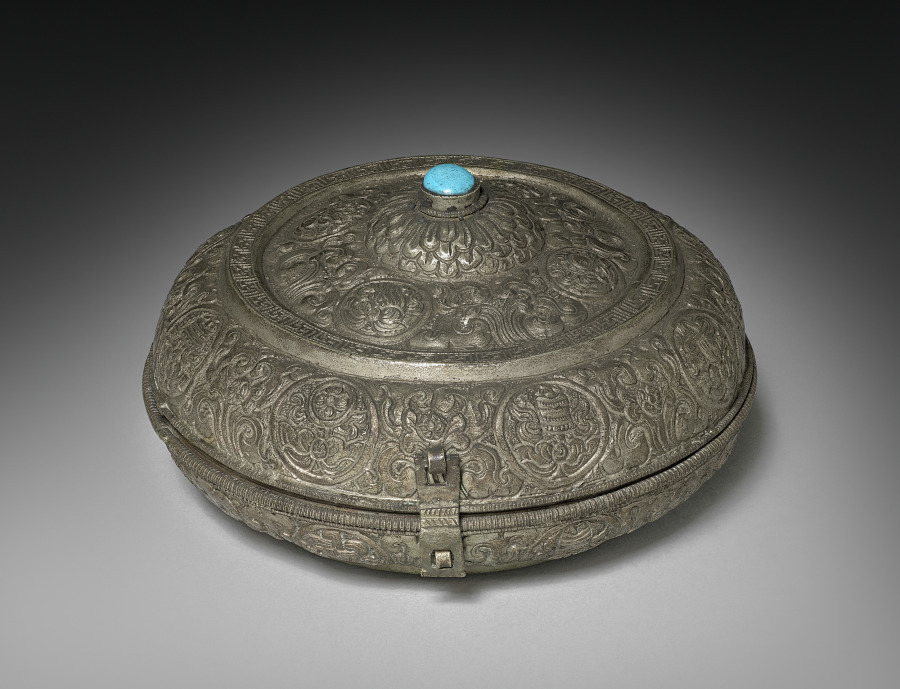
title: Betel Nut Box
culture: Tibet, 19th century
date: 1800s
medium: silver and enamel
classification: Metalwork